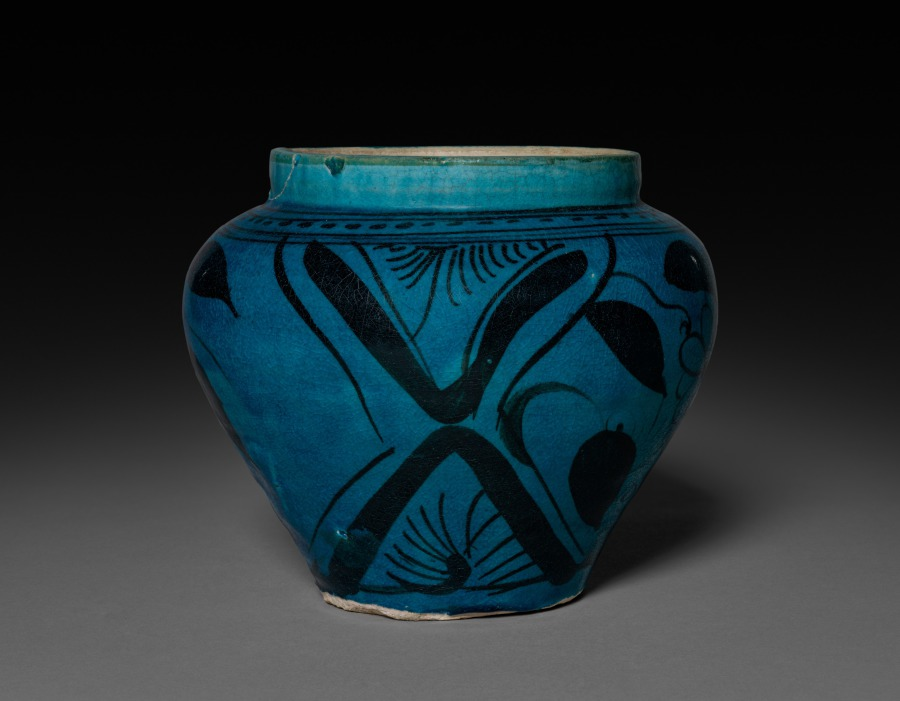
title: Jar: Cizhou ware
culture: China, Yuan dynasty (1271-1368)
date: 1271–1368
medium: stoneware with slip coating, turquoise glaze and painted underglaze decoration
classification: Ceramic